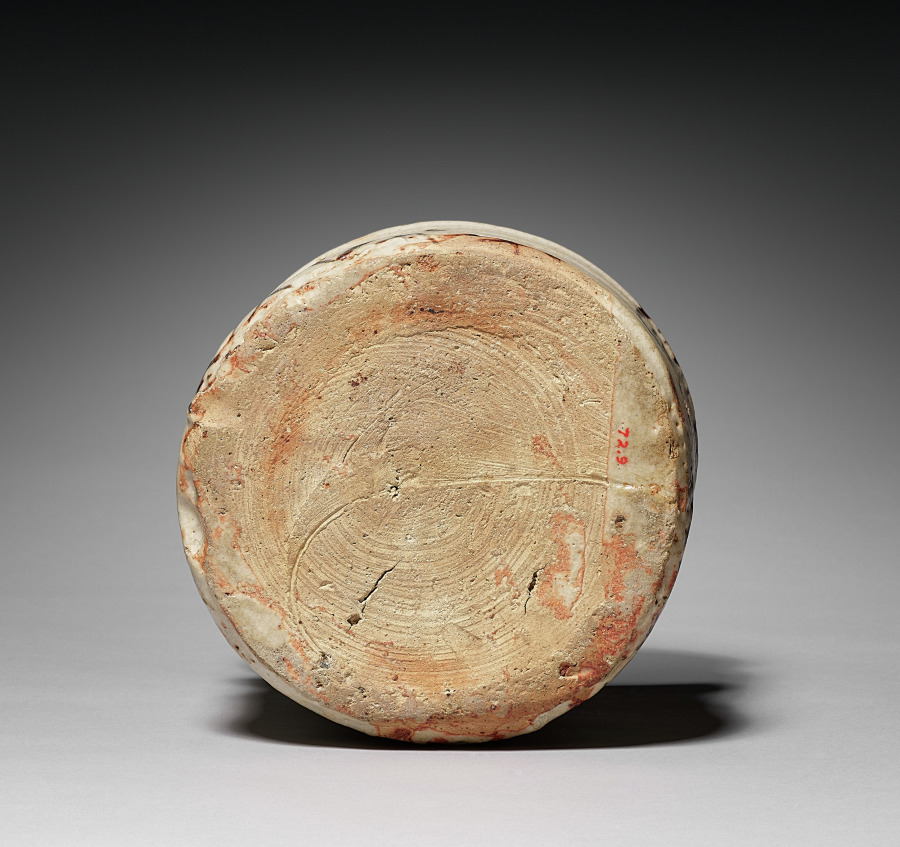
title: Water Container (Mizusashi) with Riverscape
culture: Japan, Momoyama period (1573-1615) to Edo period (1615-1858)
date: late 1500s–early 1600s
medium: Stoneware with underglaze iron oxide slip decoration (Mino ware, Shino type)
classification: Ceramic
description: Mizusashi are jars used to hold water for the preparation of tea at tea gatherings. This one was produced in the Mino area of present-day Gifu prefecture in central Japan, and is considered one of the finest of its type in existence, based on the complex aesthetic sensibilities developed around the tea ceremony in Japan. It is called a “picture Shino” (e-shino) mizusashi, as it has an abstracted design said to resemble an ink painting of reeds along a river bank and small boats in a river on one side, and a geometric pattern on the other. With its irregular shape and thick, luminous glaze, it is of a variety favored by eminent tea masters of the Momoyama period.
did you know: The water this container held during a tea ceremony was used to fill the kama, or iron pot in which the water is heated.